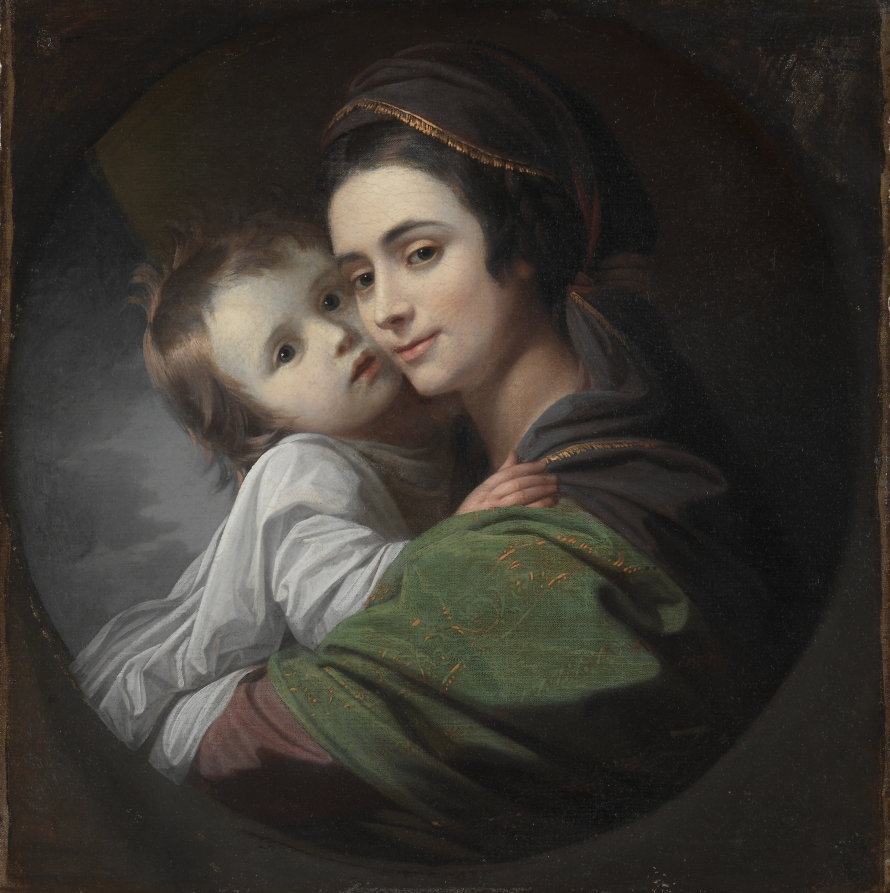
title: Elizabeth Shewell West and Her Son, Raphael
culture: America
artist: Benjamin West (American, 1738–1820)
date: c. 1770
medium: oil on canvas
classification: Painting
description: West was the first American artist to study in Italy, where he spent three years before permanently settling in London. He so admired the artistic ideals of the Italian Renaissance master Raphael that he named his eldest son after him, and he imitated Raphael’s celebrated Madonna of the Chair when composing this tender double portrait of his wife and child.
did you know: Born in colonial America, West eventually became a court painter to George III of England.